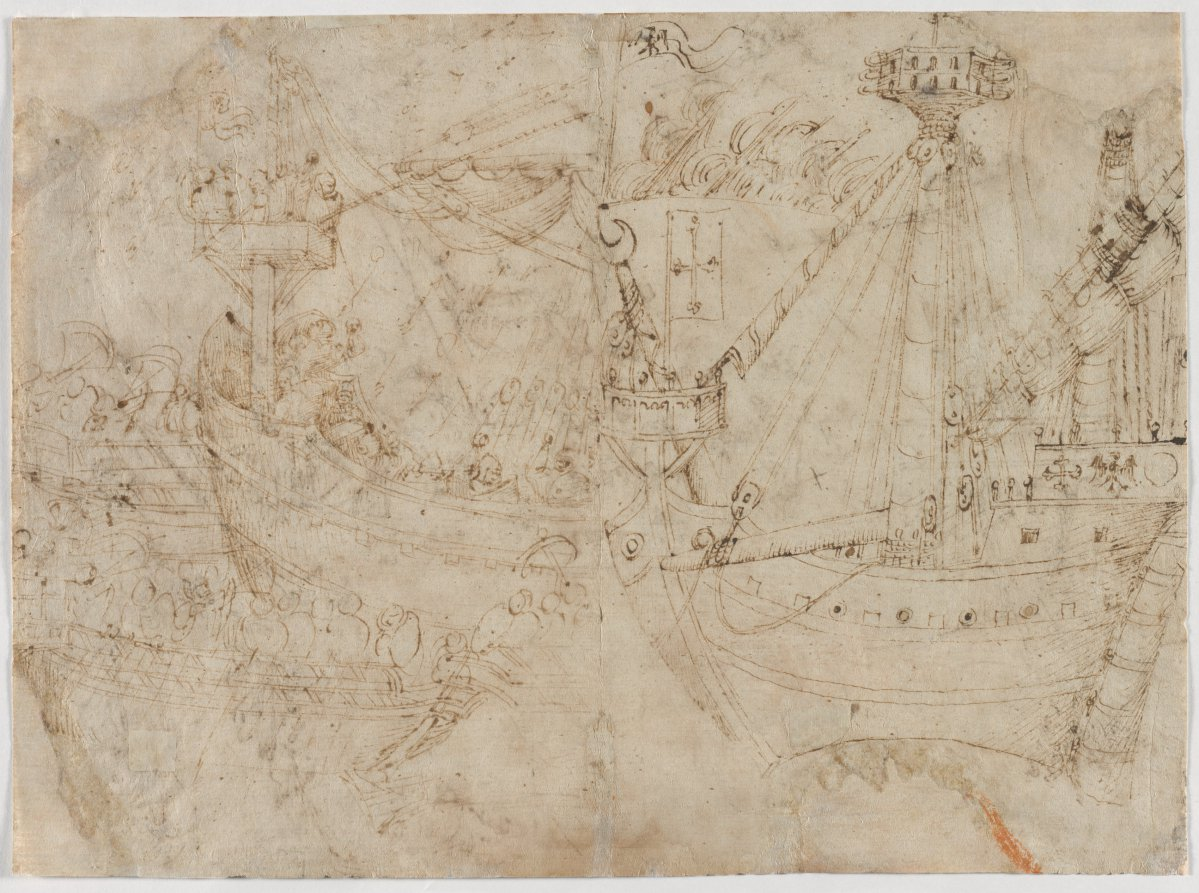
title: Two Drawings of Ships (verso)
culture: Italy, Arezzo, 15th century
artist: Parri Spinelli (Italian, 1387–c. 1453)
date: 1410s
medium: pen and brown ink (iron gall)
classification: Drawing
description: Once attributed to the Italian painter Giotto (about 1267-1337), this drawing is the oldest sheet in the Cleveland museum's collection. We now know it to be a copy by Parri Spinelli after a mosaic Giotto designed for the portico of the church of Old St. Peter's in Rome.